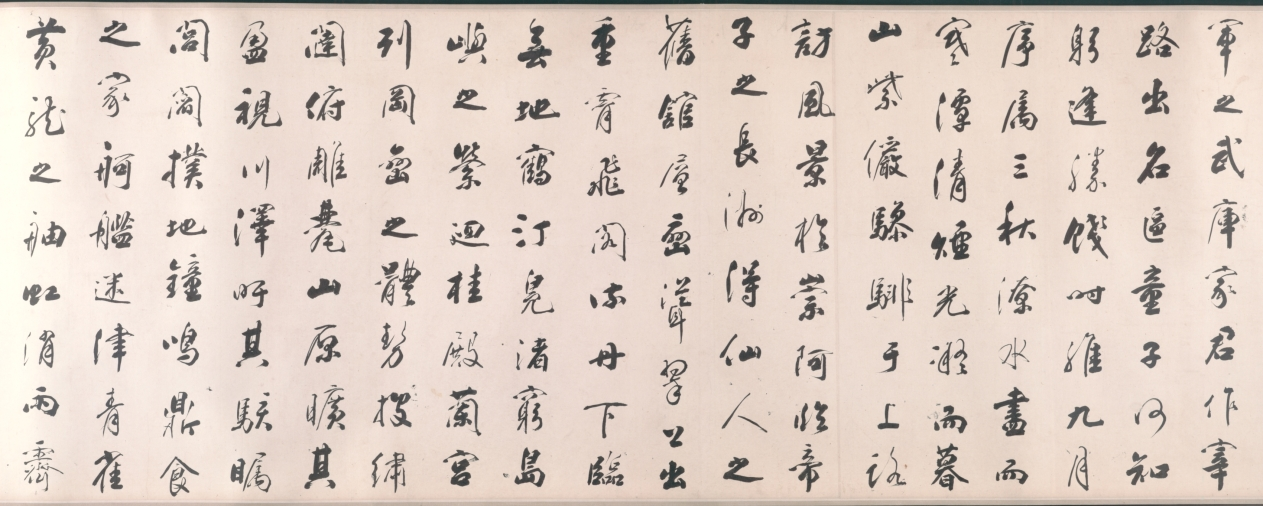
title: Calligraphy in Running Style based on Wang Bo's Essay on Tengwang Pavilion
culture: China, Changbai, Qing dynasty (1644-1911)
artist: Tiebao (Chinese, 1752–1824)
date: 1811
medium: handscroll, ink on paper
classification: Calligraphy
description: A member of the Donggo clan, Tiebao belonged to the Manchu Plain Yellow Banner army. As an official in the Qing court, he endured considerable vicissitude and his career was never smooth. Celebrated as a man of letters, he oversaw the publications of the Manchu military system as well as an anthology of poems by members of the imperial family and other Manchu dignitaries. In calligraphy, he was regarded as the equal of such eighteenth-century luminaries as Liu Yong (1720-1805) and Weng Fanggang (1733-1818). This handscroll is a work of his mature years and is exemplary of his disciplined and highly subtle approach to the art of calligraphy.